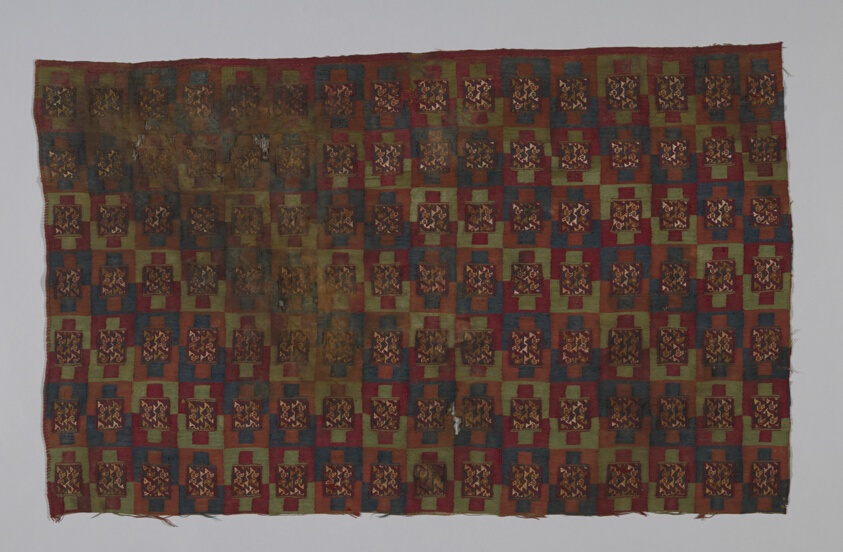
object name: Textile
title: Fragment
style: Chuquibamba, inca, late intermediate period, Pre-Columbian, americas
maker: Chuquibamba (Peru, Probably south coast)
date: A.D. 1476/1532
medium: Wool (camelid), interlocking tapestry weave with inserts of complementary weft weave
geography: Peru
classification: textile; weaving